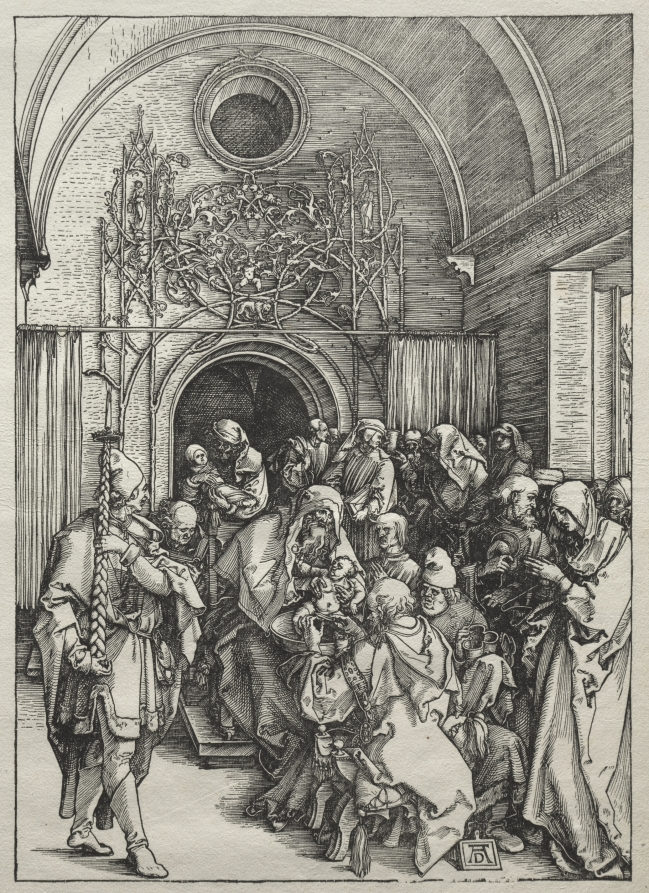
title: Life of the Virgin: The Circumcision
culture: Germany, early 16th Century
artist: Albrecht Dürer (German, 1471–1528)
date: 1504–5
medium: woodcut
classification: Print